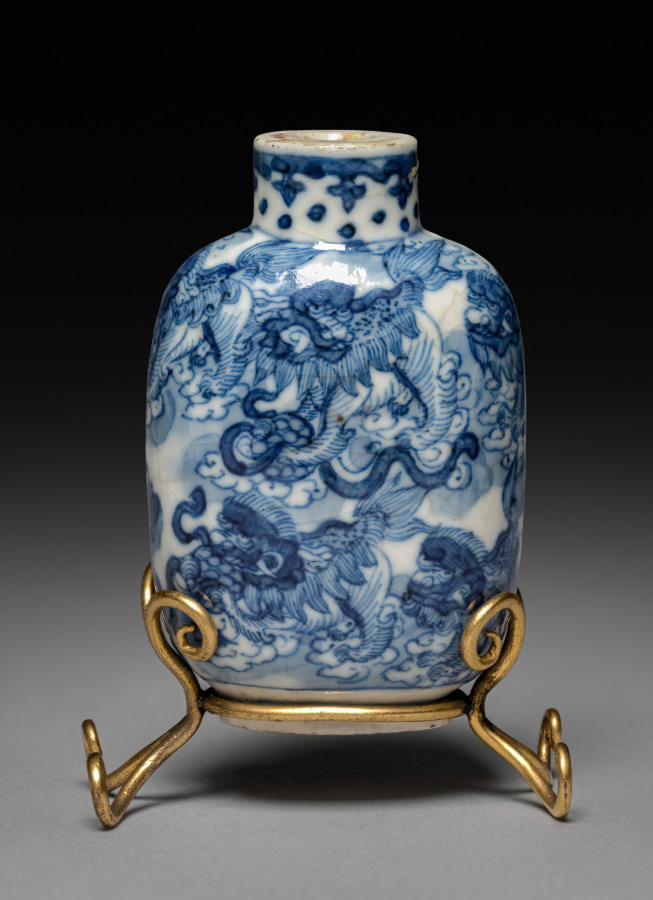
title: Flattened Ovoid Snuff Bottle with Stopper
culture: China, Jiangxi province, Jingdezhen kilns, Ming dynasty (1368-1644), Wanli reign (1572-1620)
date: 1573–1620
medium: porcelain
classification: Ceramic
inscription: 萬曆年製